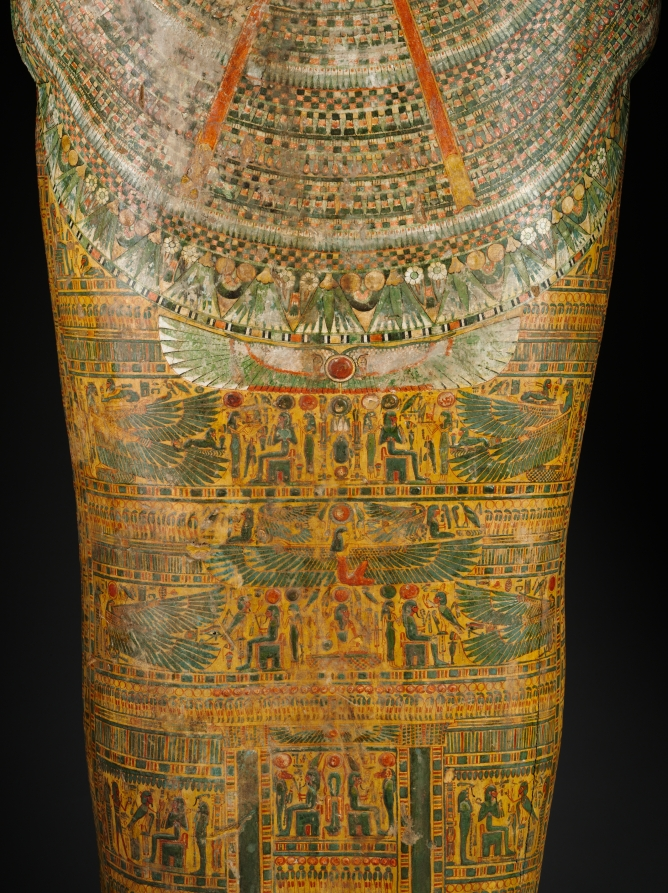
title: Coffin of Bakenmut (lid)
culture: Egypt, Thebes, Third Intermediate (1069–715 BCE), Dynasties 21–22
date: c. 1000–900 BCE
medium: gessoed and painted sycamore fig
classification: Funerary Equipment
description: The coffin of Bakenmut is one of the finest examples of painted wooden coffins made for the priests of Amen and their families at Thebes during Dynasty 21 and early Dynasty 22. The pharaohs of this time were no longer buried in the Valley of the Kings, but instead built tombs in the Delta, far to the north, where they resided. Security was lax in the Theban necropolis. The coffins and funerary goods of the wealthy citizens of Thebes were placed in unmarked and undecorated family tombs cut into the cliffs on the west bank of the Nile. All the care and detail that in more prosperous times were devoted to the decoration of the tomb chapel were now lavished on the elaborately painted coffins. Every available surface is crowded with religious scenes, images of funerary gods and goddesses, protective spells, and magical symbols. The deceased appears mummiform. An elaborate floral collar entirely covers the upper body, exposing only the separately attached hands (now lost). A pair of red "mummy braces" are crossed over the chest, their point of intersection marked by a winged sun disk. The lower body is covered with tiny figures modeled in gesso against a yellow background, which gives the effect of gold inlaid with glass or semiprecious stone. The decoration on the interior features two deified dead kings of Dynasty 18. Although these rulers had lived centuries before, memory of their greatness was still very much alive. The main scene near the top depicts Tuthmosis III, the great military pharaoh, who lived 500 years before Bakenmut. Posed as a mummy, the ruler wears a brilliant feathered garment enfolding him with falcon’s wings. The scene below features back-to-back seated images of Amenhotep I, regarded as the patron of the Theban cemetery and worshiped as a local god there.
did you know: Originally another smaller coffin was placed inside this outer coffin and in that the deceased with a mummy board would have rested.